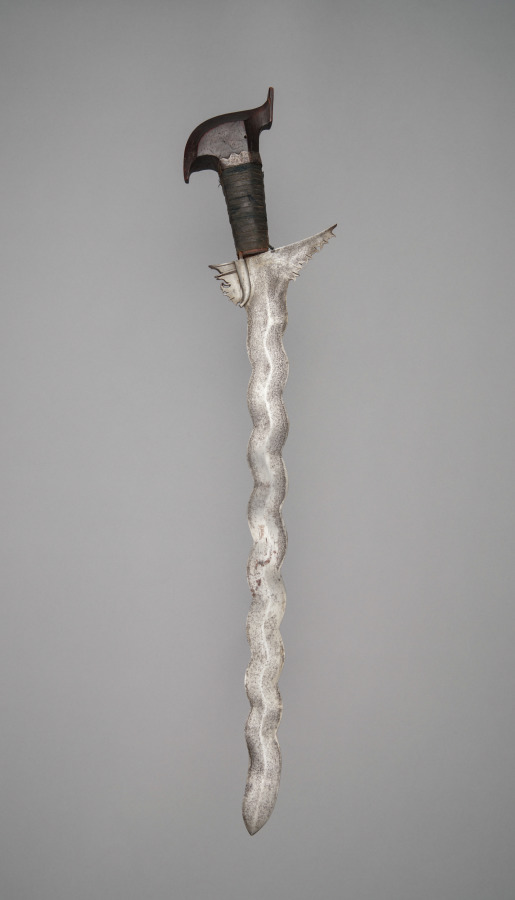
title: Sword (Kalis or Sundang)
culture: Philippines, Mindanao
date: 1800s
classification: Arms and Armor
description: The blade of this kalis displays undulations across its entire length, as well as flared shoulders and a pierced wing-type guard carved with okir-style serrations. A single asang-asang (fish gill) clamp secures the guard. The kamagong pommel takes the form of a cockatoo (kakatua). The shape and material indicate a functional but less prestigious object compared with ivory and silver examples made for the Tausug or Maranao people.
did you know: Blades with an odd number of undulations were preferred; this example has nine.